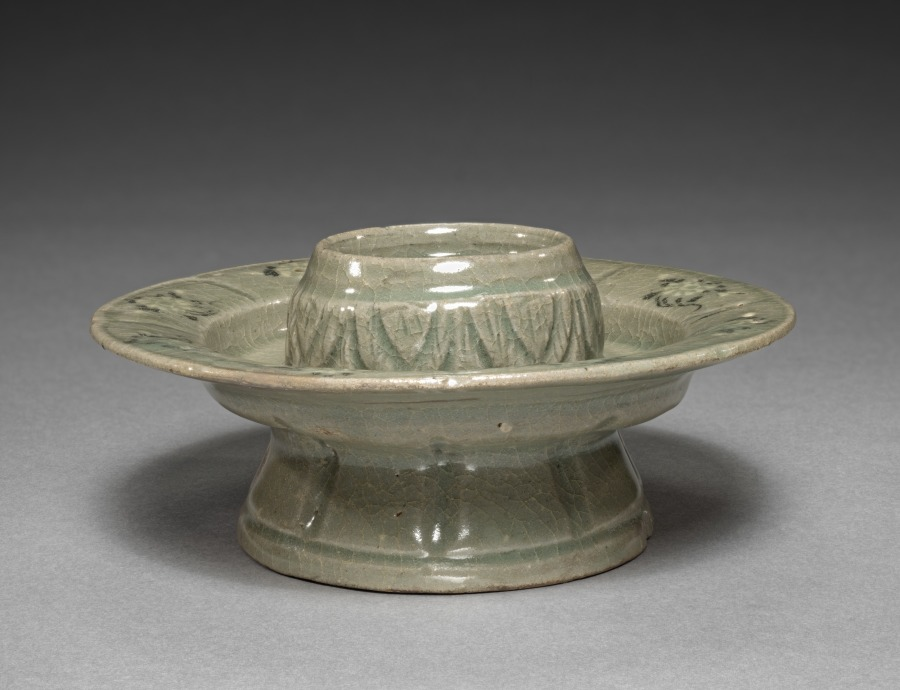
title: Floral-shaped Cup Stand with Inlaid Chrysanthemum Design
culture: Korea, Goryeo dynasty (918–1392)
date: 1100s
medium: inlaid and glazed porcelain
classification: Ceramic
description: As early as the 600s, the practice of drinking tea and wine became an important part of elite culture in Korea. Elites of the Goryeo period commissioned a variety of types of utensils and vessels including this delicate-looking cup stand, not only to make their drinking experience more exciting, but also to show their refined taste.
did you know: During the Goryeo period, a variety of types of tea ware, including this delicate-looking cup stand, were widely used.